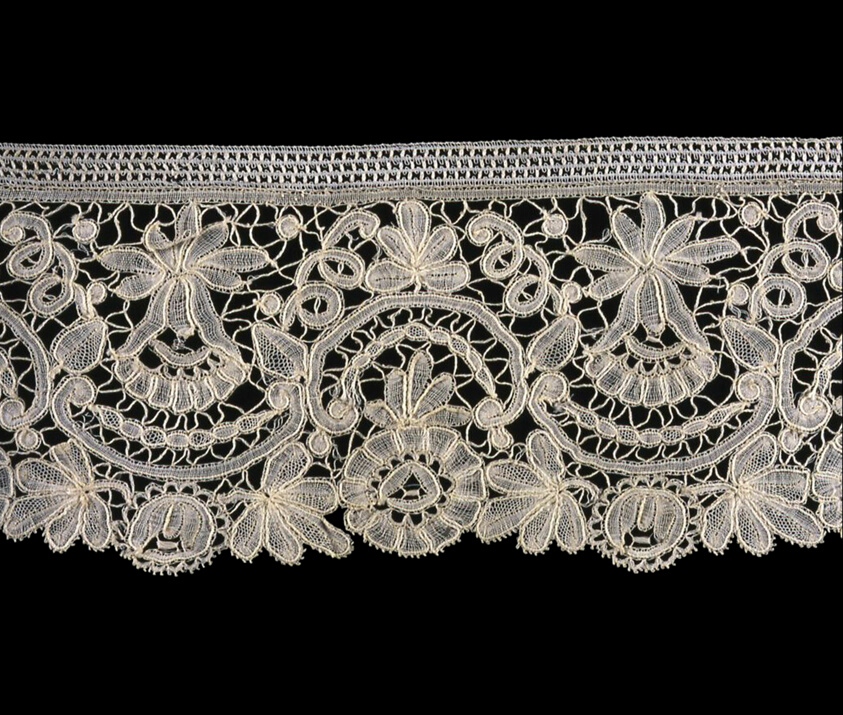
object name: Textile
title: Two Border Fragments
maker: Belgium, probably Bruges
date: 1860s/80s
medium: Cotton, bobbin part lace of a type known as "Duchesse de Bruges"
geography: Belgium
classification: textile; lace - bobbin